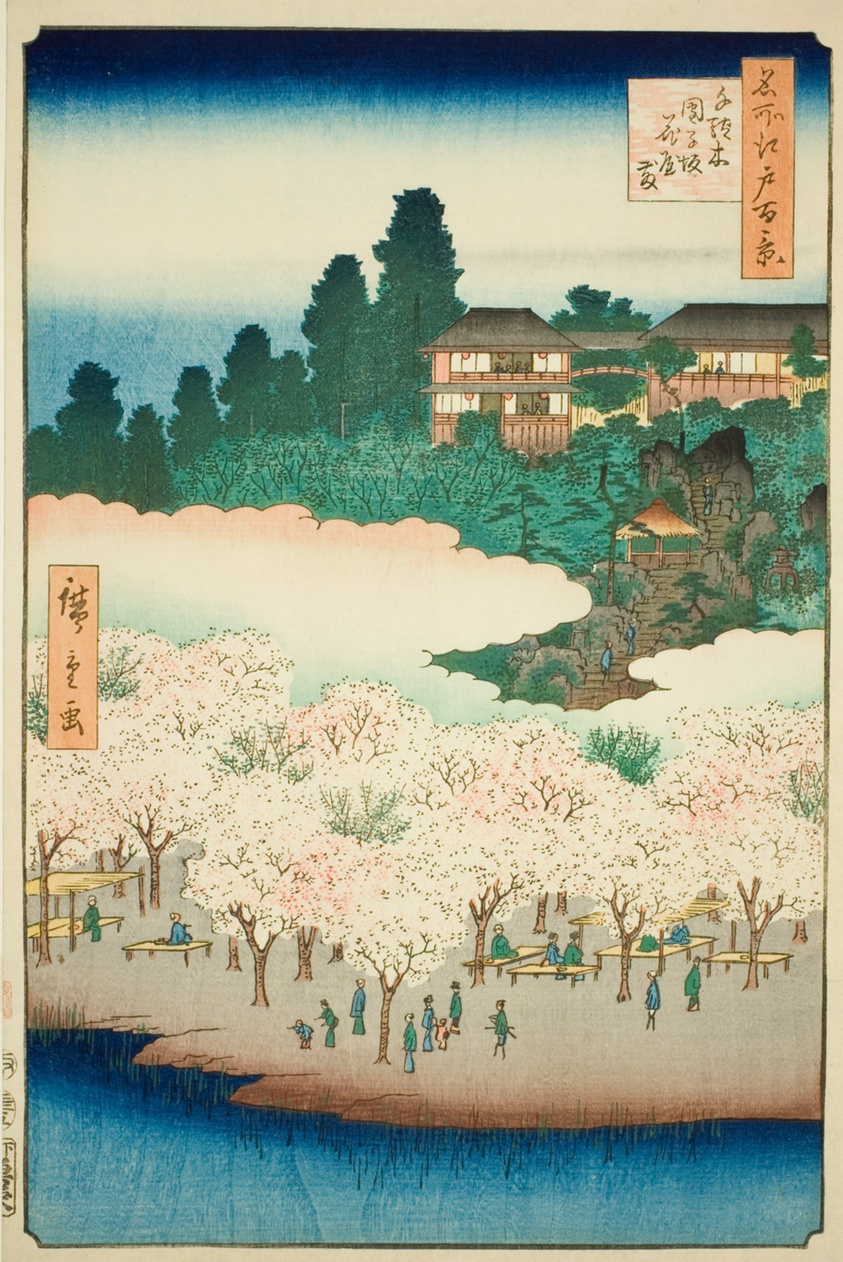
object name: Print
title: The Flower Pavilion on Dango Slope, Sendagi (Sendagi Dangozaka Hanayashiki), No.16 from the series "One Hundred Famous Views of Edo (Meisho Edo hyakkei)"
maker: Utagawa Hiroshige (Japanese, 1797-1858)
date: 1856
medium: Color woodblock print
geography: Japan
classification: woodblock print; print; asian art